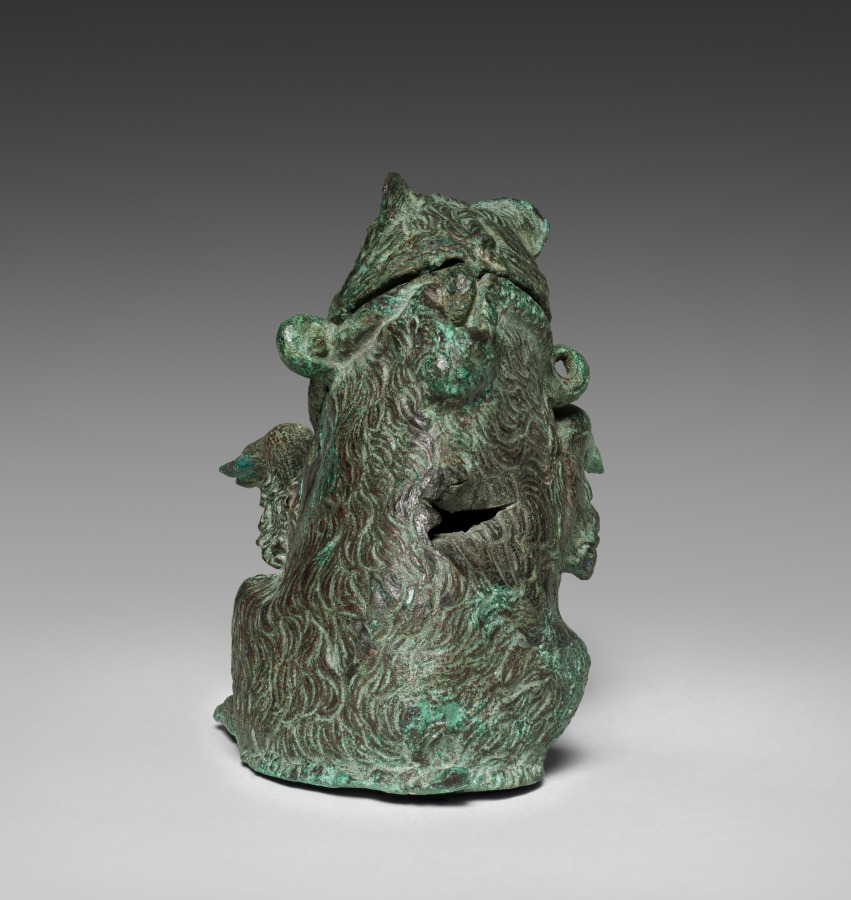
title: Oil Ampulla in the Form of a Dancing Bear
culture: Italy, Roman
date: 200s CE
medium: bronze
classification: Sculpture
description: This bronze bear sits on its hindquarters with its front paws raised, head slightly turned left, and mouth gaping open. It wears a collar around its neck with two rings on either side, where a chain would be passed through to suspend the ampulla. The bear’s head is hinged at the back of the collar to open the vessel, with the lower jaw forming a spout. The eyes were once pierced to prevent an airlock within the ampulla. Bears, like many other animals in antiquity, were used as a form of entertainment, demonstrated here by the bear’s “dancing” pose.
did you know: This ampulla was likely used to carry oil to the baths in antiquity.